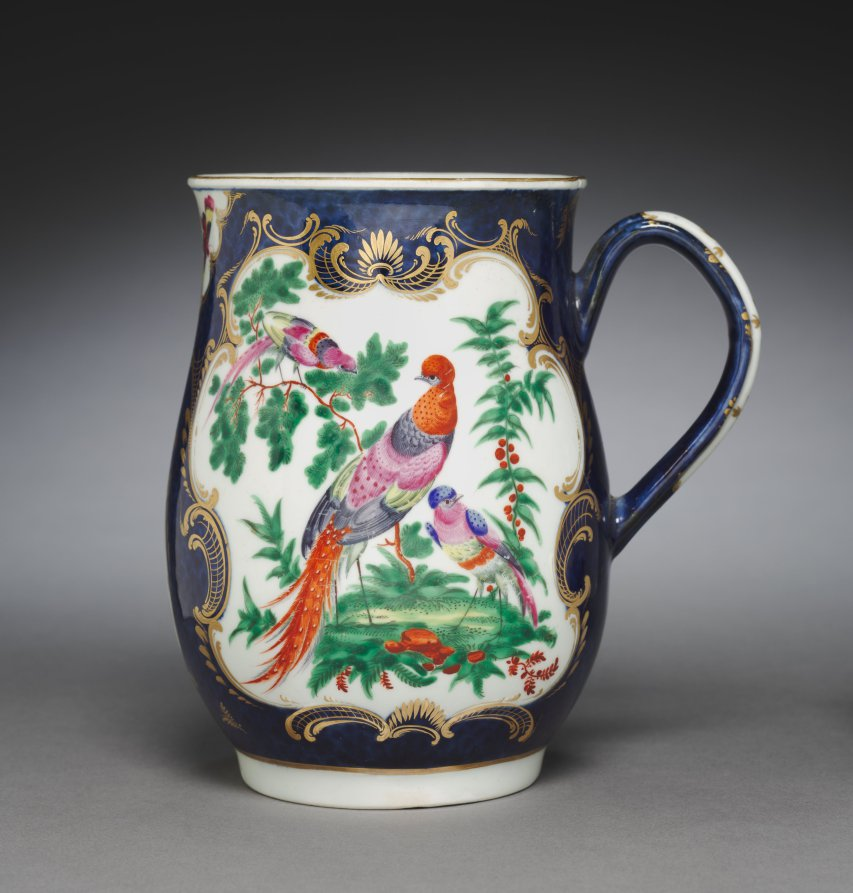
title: Tankard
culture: England, 18th century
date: c. 1770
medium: ceramic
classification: Ceramic